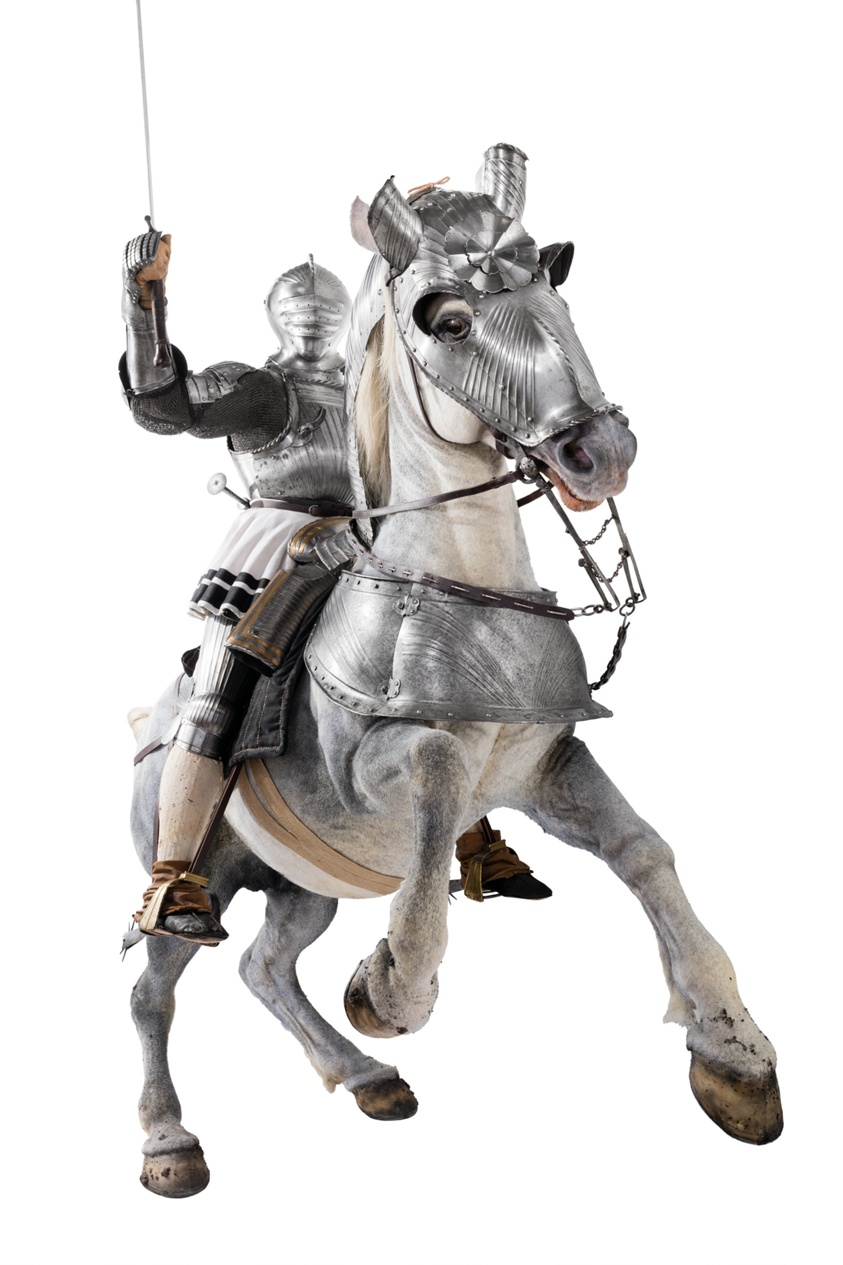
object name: Armor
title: Peytral of a Horse Armor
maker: German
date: c. 1520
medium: Steel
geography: Germany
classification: horse equipment; armor; arms and armor